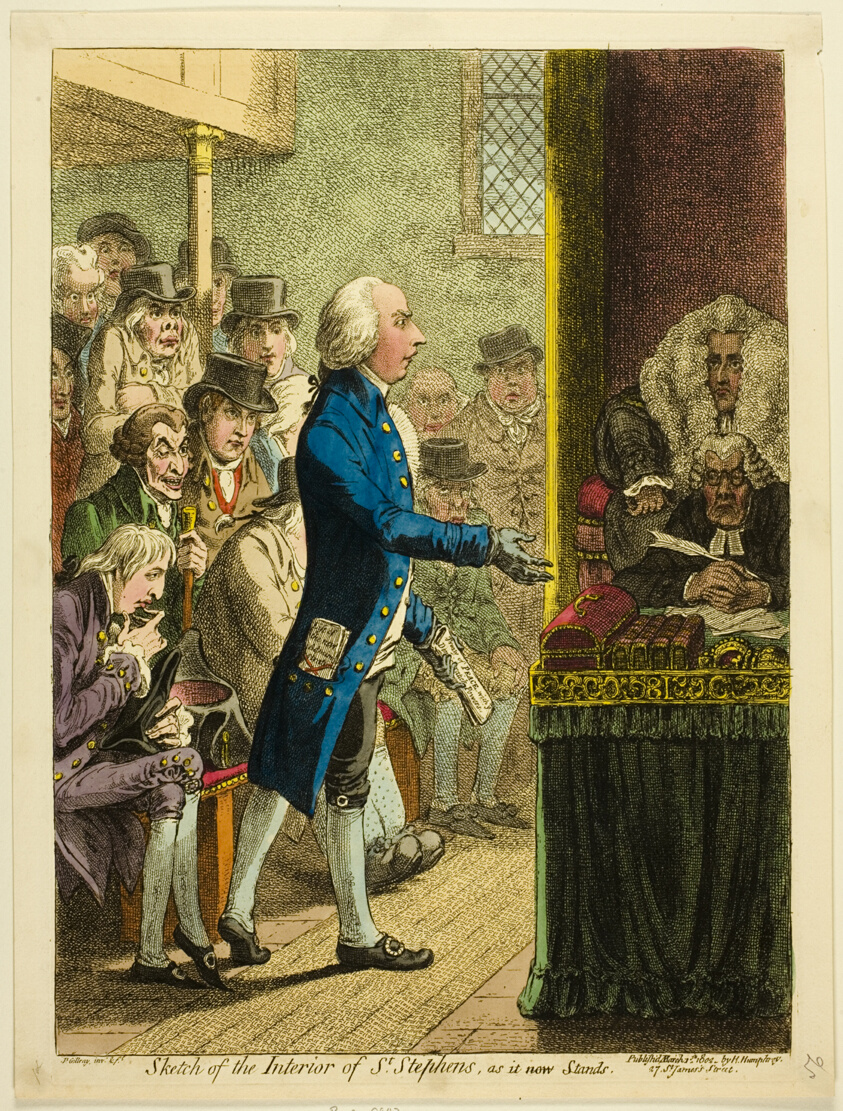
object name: Print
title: Sketch of the Interior of St. Stephens, As it Now Stands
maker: James Gillray (English, 1756-1815); published by Hannah Humphrey (English, c. 1745-1818)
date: published March 1, 1802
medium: Hand-colored etching on paper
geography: England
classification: etching; print; prints and drawing